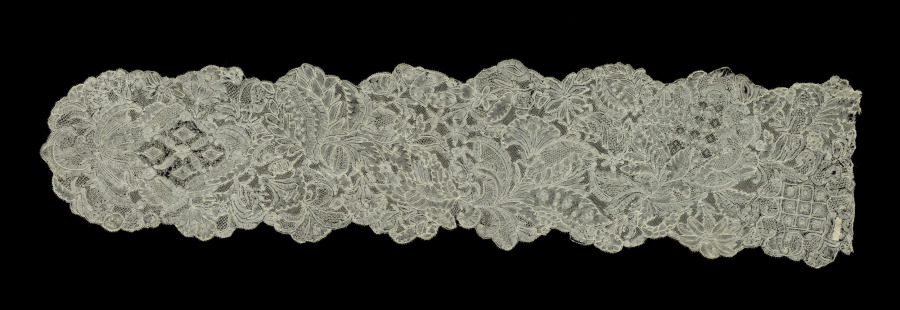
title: Lace Lappet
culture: Belgium, Brussels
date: 1700s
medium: Linen: bobbin lace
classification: Lace